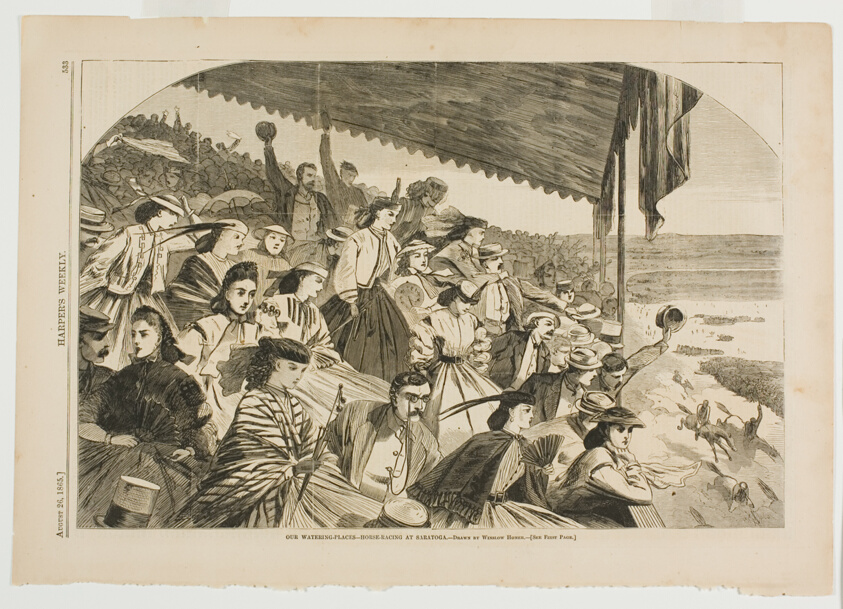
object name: Print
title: Our Watering Places—Horse-Racing at Saratoga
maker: Winslow Homer (American, 1836-1910); published by Harper's Weekly (American, 1857-1916)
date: published August 26, 1865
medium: Wood engraving on paper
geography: United States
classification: wood engraving; print; prints and drawing